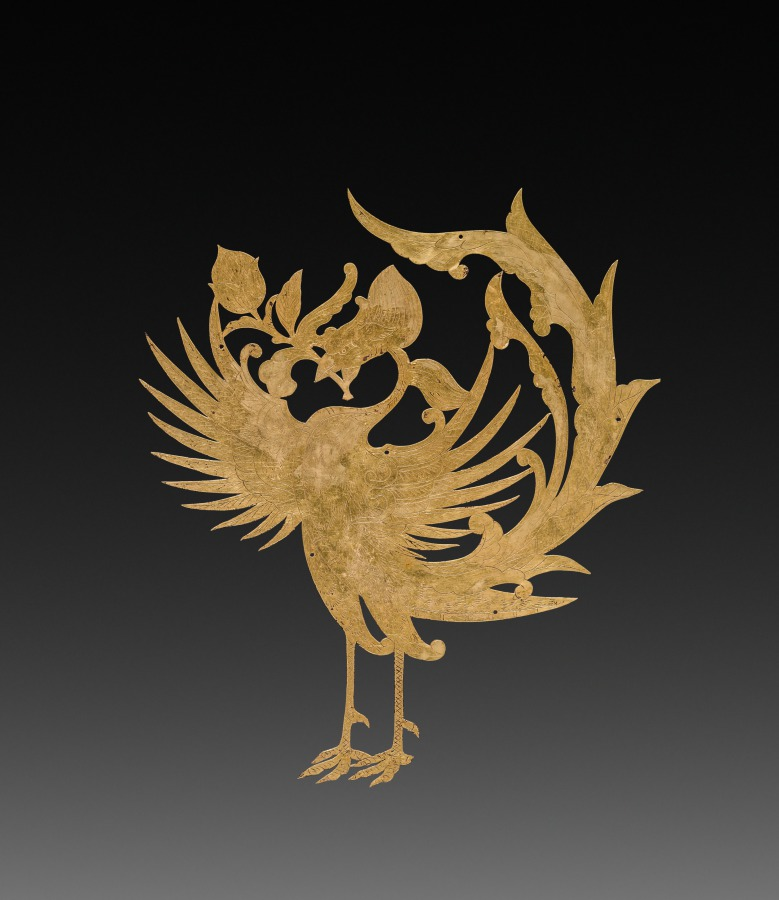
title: Textile Ornament(?): Phoenix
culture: China, Tang dynasty (618-907)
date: c. 700s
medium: beaten gold with chased detail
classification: Metalwork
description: This phoenix bird made of thin gold foil has tiny holes all along its edges, suggesting that it was sewn onto a textile.